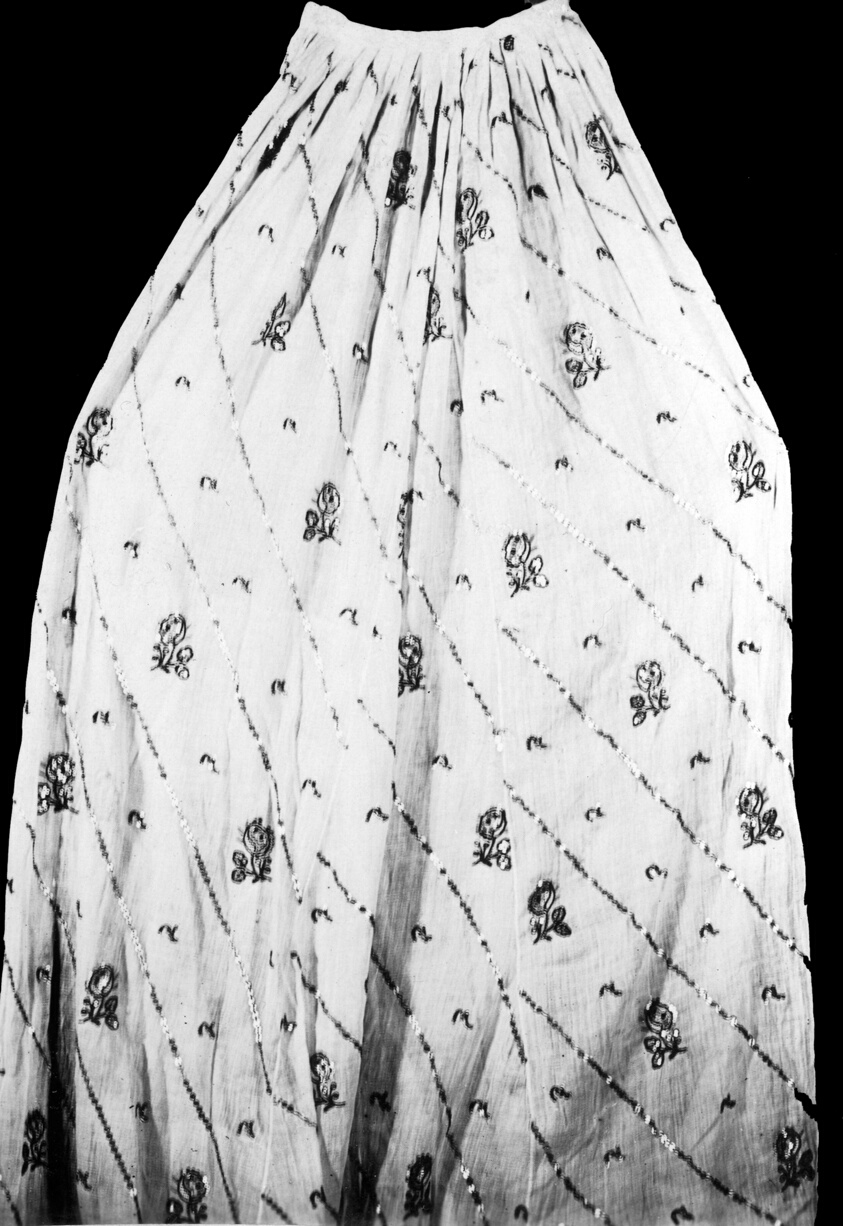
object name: Textile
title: Over Skirt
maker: France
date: c. 1810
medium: Cotton, plain weave; embroidered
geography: France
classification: textile; needlework (visual works); costume - needlework; costume